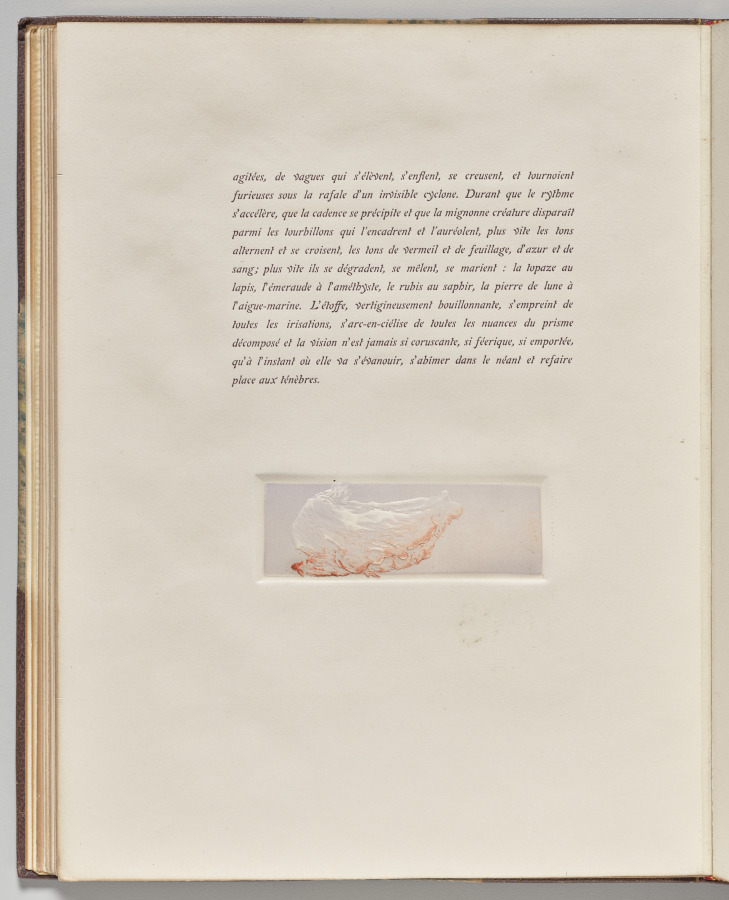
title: Dancing Woman Slightly Crouched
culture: France, early 20th Century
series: La Loïe Fuller, by Roger Marx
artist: Pierre Roche (French, 1855–1922)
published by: Les Cents Bibliophiles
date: 1904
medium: gypsograph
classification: Bound Volume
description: Although best known as a sculptor, Roche was a versatile and prolific artist who worked in many mediums. Loïe Fuller, the pioneer of modern dance who took Paris by storm in 1892, was one of his favorite subjects. He portrayed her in clay, bronze, marble, plaster, and in a series of gypsographs that illustrated an essay by the art critic Roger Marx. The book was described as "a precious monument to Loïe Fuller."